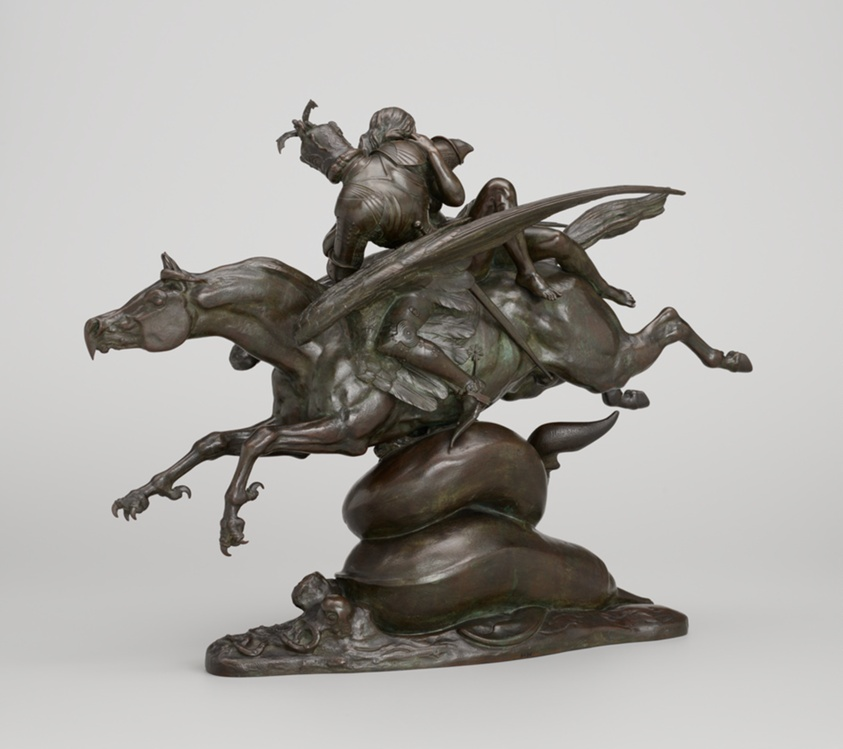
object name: Sculpture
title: Roger and Angelica Mounted on the Hippogriff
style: nineteenth century, 19th century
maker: Antoine Louis Barye (French, 1795–1875)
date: Modeled c. 1840, cast c. 1884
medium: Bronze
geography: France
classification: statuette; french; sculpture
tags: mythical, woman, royalty, royal, poetry, man, knights, fantastic beasts, animals